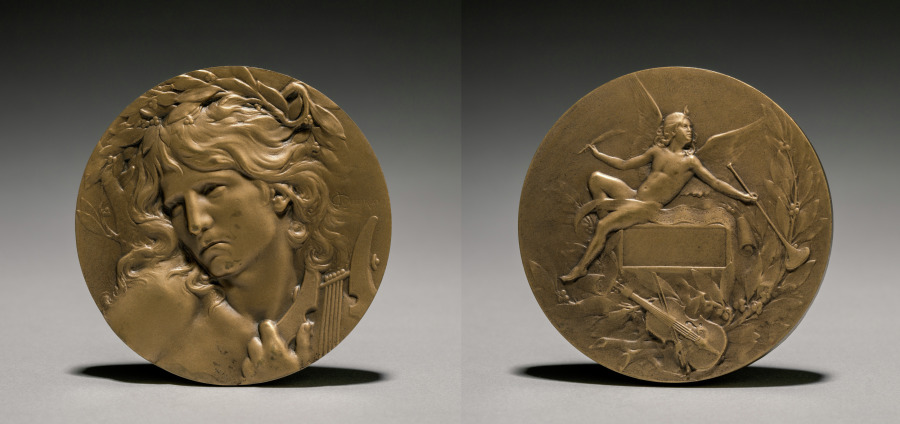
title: Medal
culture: France, 20th century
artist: Marie Alexandre Lucien Coudray (French, 1864–1932)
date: 1900s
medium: bronze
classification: Metalwork